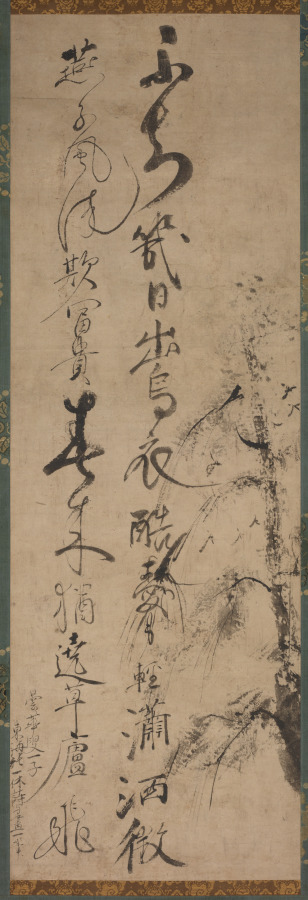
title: Calligraphy with Willow and Swallows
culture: Japan, Muromachi period (1392–1573)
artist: Ikkyū Sōjun (Japanese, 1394–1481)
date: 1400s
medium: hanging scroll, ink on paper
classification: Painting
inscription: How many days has it rid itself of the crow’s cloth? It knows not!/ Lovely is its body so nimble and neat./ Neither men of wealth, courtly position, or power can come close to the unfettered, noble swallow!/ With the coming of spring, it seems to be flying about, dancing around the grass hut of the foolish Priest. signed: Unkasō Isshi Tōkai jun Ikkyū shi ga ippitsu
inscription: outer box inscribed: Ikkyū Ōshō Enshi-zu Jigasan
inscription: inner box side lid inscribed: Showa 50 (1975), November by Tayama Honan with kao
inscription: Inner box side lid inscribed: Ikkyū Ōshō Bokuseki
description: The famed Buddhist monk Ikkyū is best remembered for his calligraphy. Calligraphic conventions of his time called for brushwork that did not vary much in style from character to character. However, as Ikkyū’s lines progress, his brushwork wanders between standard script and a sort of shorthand, marked by an uneven distribution of ink and a reduction of the characters to only the most necessary strokes. Ikkyū’s direct communication of emotion via brushwork became characteristic of the works produced by monks affiliated with the temple Daitokuji later in the Edo period (1615–1868).